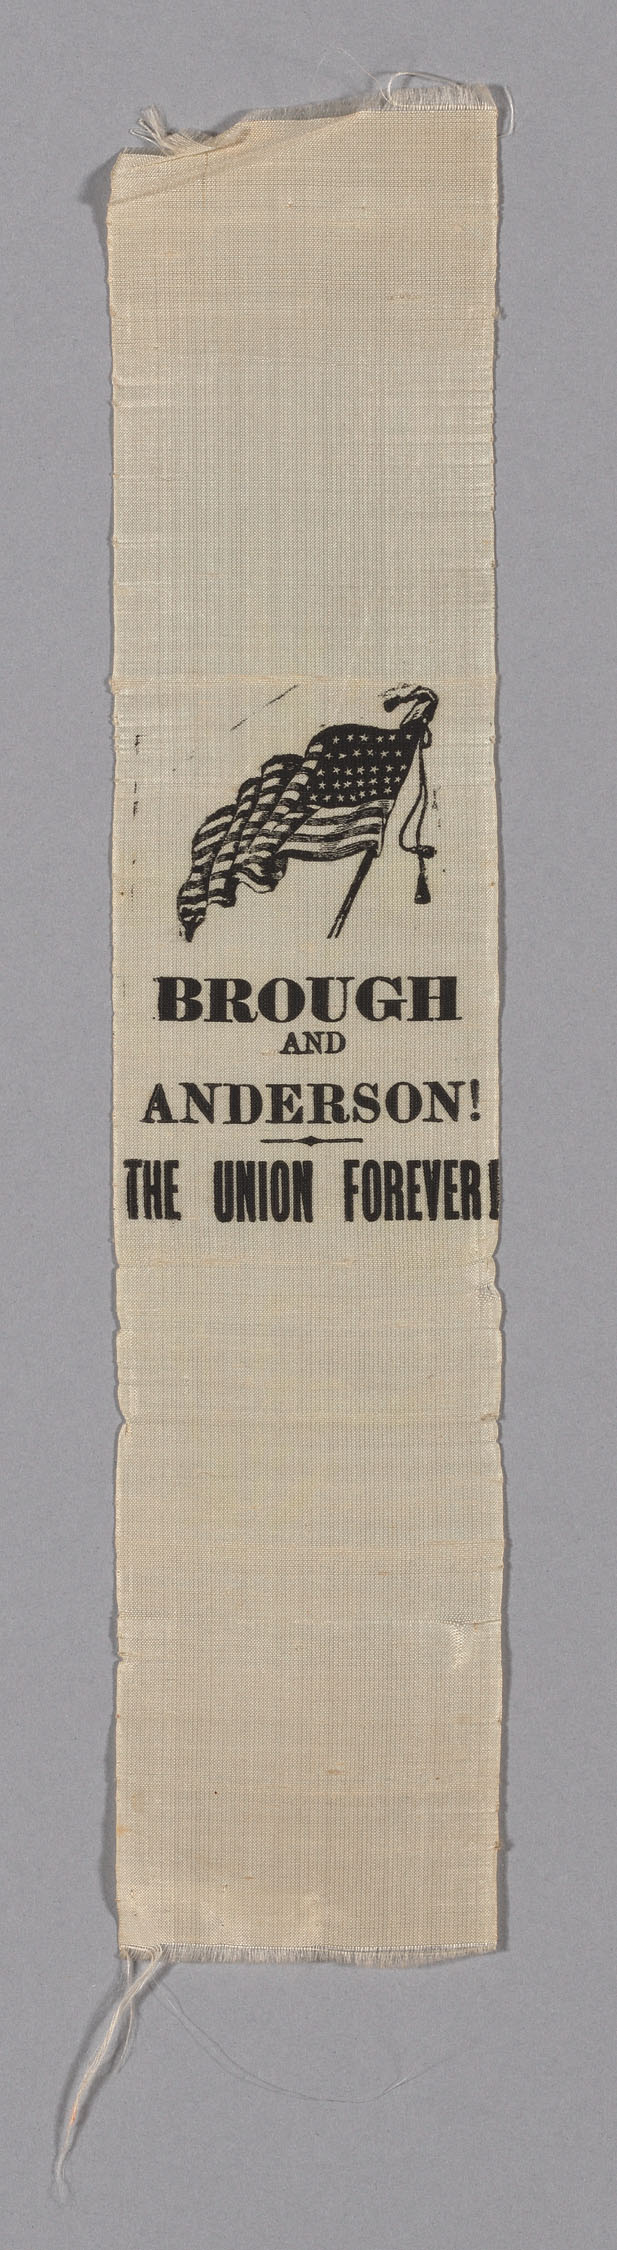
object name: Textile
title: Campaign Ribbon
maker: United States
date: 1863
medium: Silk, plain weave; printed; two selvages present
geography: United States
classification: textile; weaving; weaving - printed